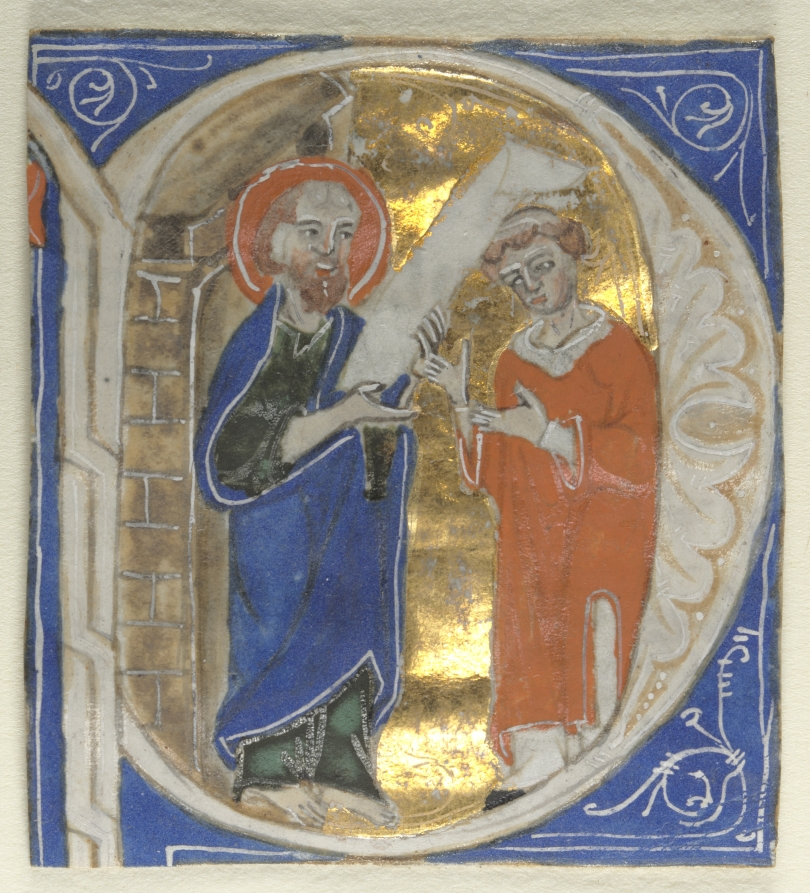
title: Historiated Initial Excised from a Bible: St. Paul and a Cleric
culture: Italy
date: 1200s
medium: tempera and gold on parchment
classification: Manuscript